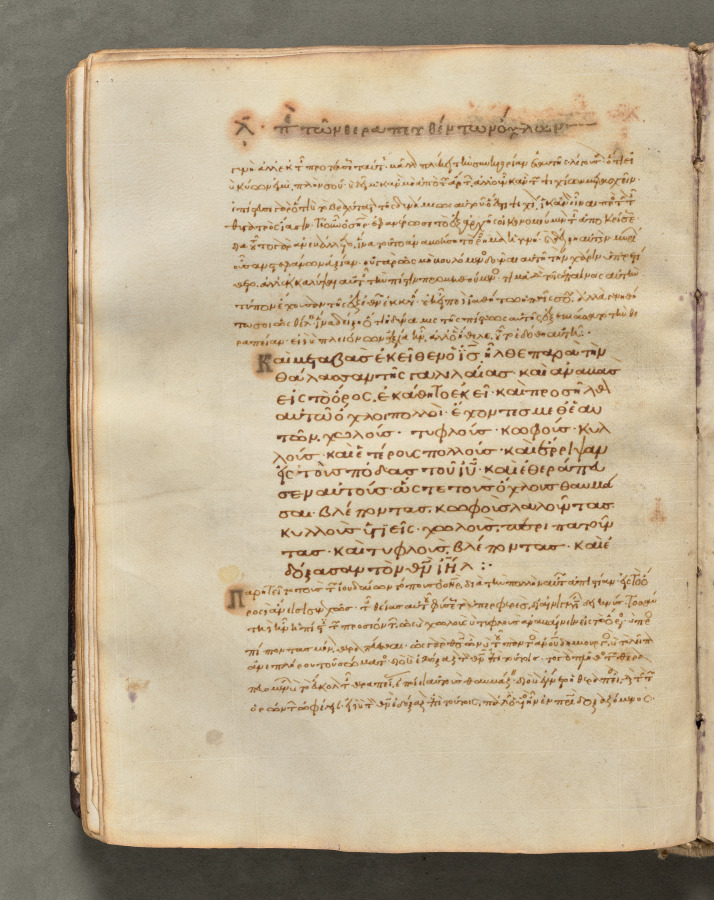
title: Text, folio 70 (verso), from a Gospel Book with Commentaries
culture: Byzantium, Constantinople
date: c. 1000–1100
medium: ink, tempera, and gold on vellum; leather binding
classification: Bound Volume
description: Each of the four gospels in this book opens on a page with brilliantly illuminated borders depicting the author of the text as well as birds-principally peacocks, symbols of the immortality of the soul-and fountains, representing the fountain of life and the salvation of the soul. This volume consists of 428 leaves with texts in Greek. Its level of sophistication suggests that it was probably written and decorated in a monastery in Constantinople.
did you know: Gospel Books were carried in procession through Byzantine churches.